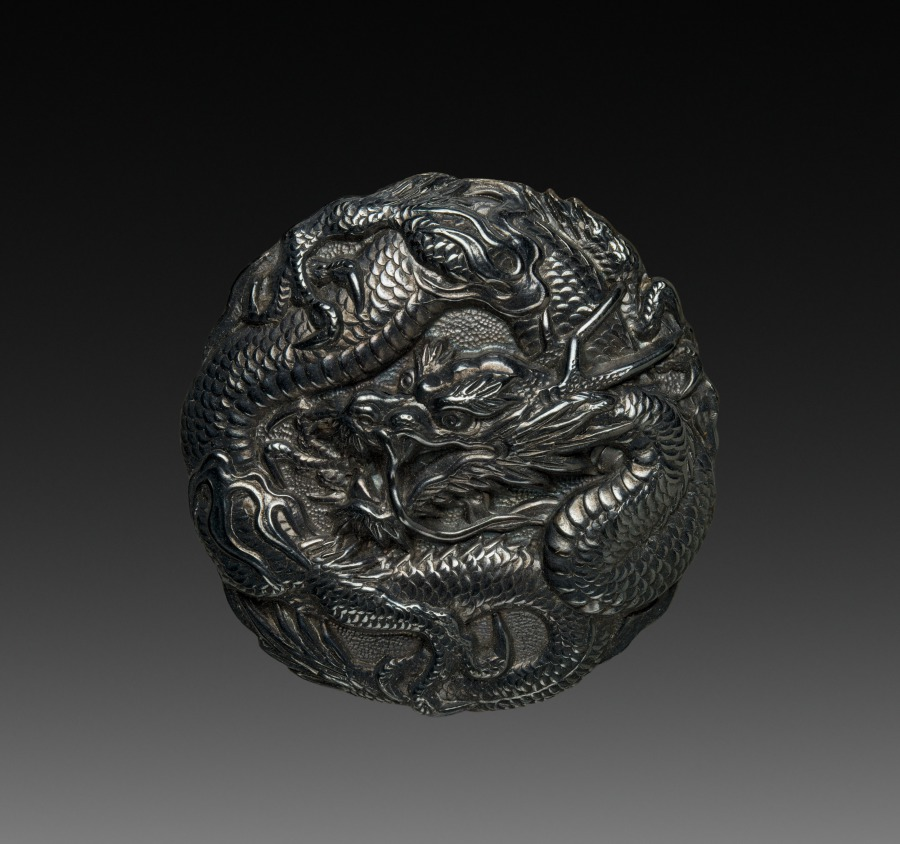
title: Button with Dragon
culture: Japan, Meiji period (1868–1912) to Taishō period (1912–26)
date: early 1900s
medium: One of a set of six buttons; cast (?) silver with relief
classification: Metalwork